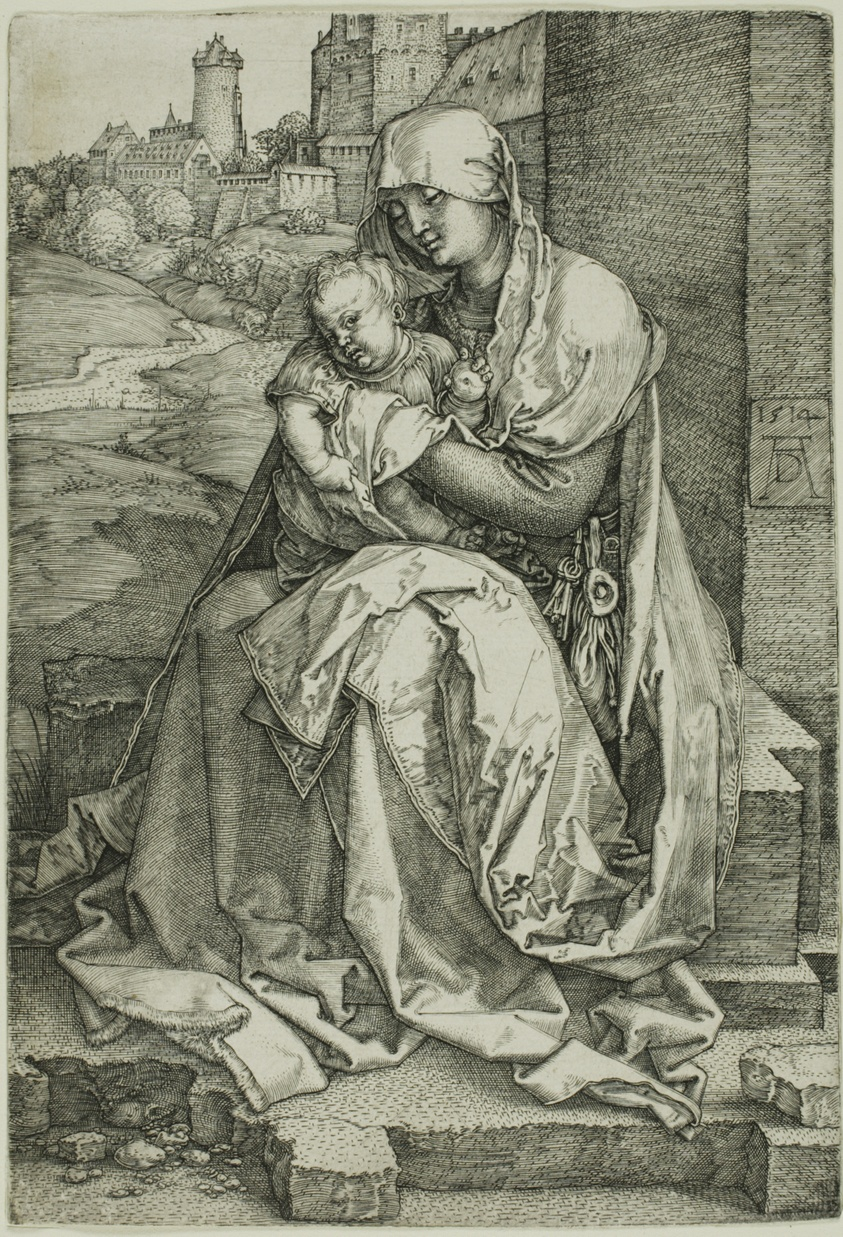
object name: Print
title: Madonna by the Wall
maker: Albrecht Dürer (German, 1471-1528)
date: 1514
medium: Engraving in black on ivory laid paper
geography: Germany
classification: engraving; print; prints and drawing; paper